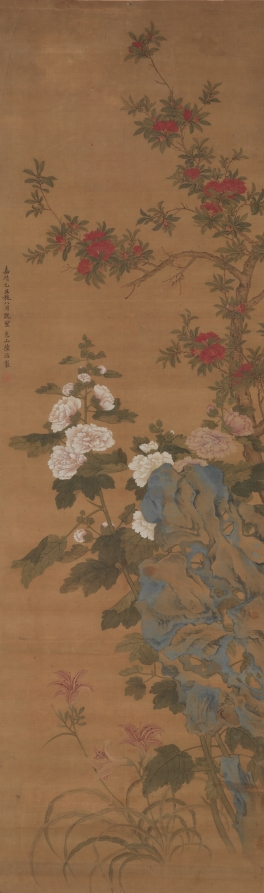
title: Flowers and Rocks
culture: China, Ming dynasty (1368–1644)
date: 1368–1644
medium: hanging scroll, color on silk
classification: Painting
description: Here, the painter uses delicate brushwork and vivid colors to depict an early summer scene of three kinds of flowers growing beside a garden rock: From top to bottom we see flowering pomegranate, then peonies, and lilies below. Like the peony, which conveys wishes for wealth and prosperity, the pomegranate flower, here in festive red color turning soon into fruit with many seeds, is associated with the wish for many sons. The lily, in Chinese "baihe," is a homophone with the pun "togetherness for a hundred years," expressing wishes for harmony and unity. The scroll would have made a suitable gift to married women.